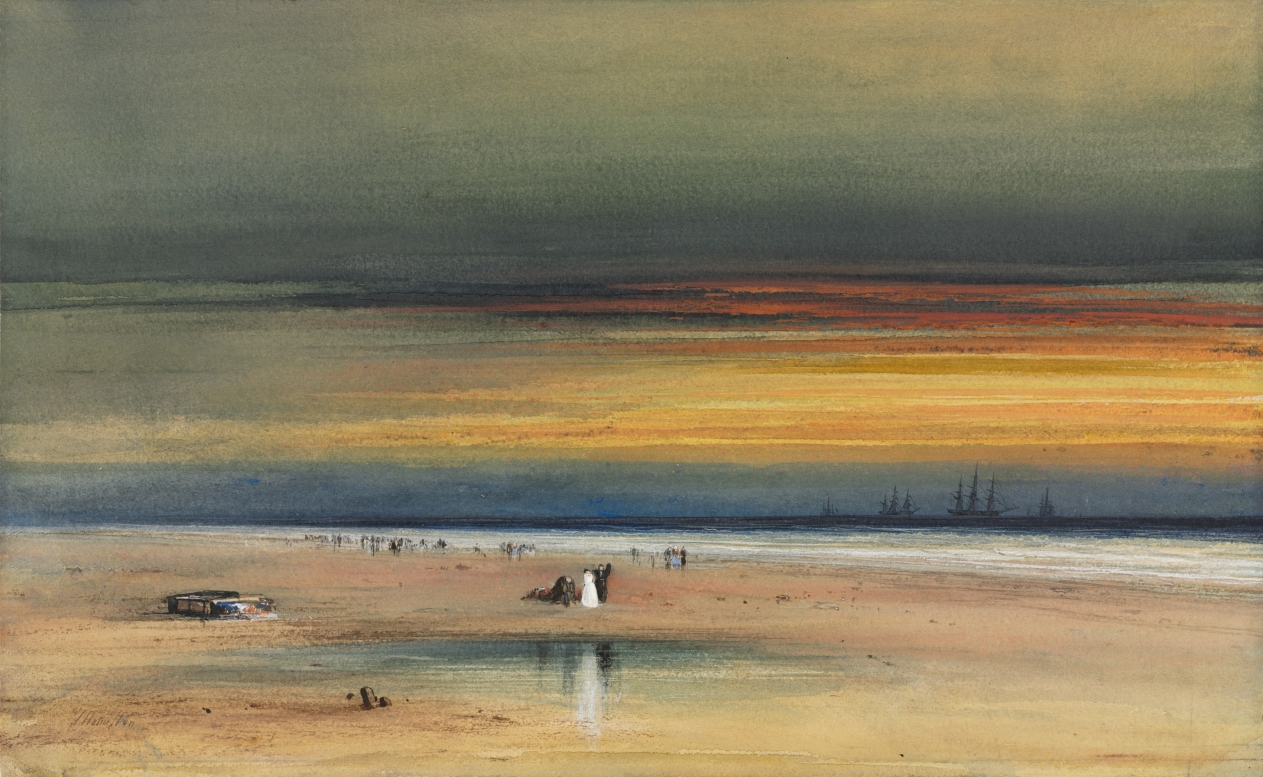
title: Beach Scene at Sunset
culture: America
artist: James Hamilton (American, 1819–1878)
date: c. 1865–1870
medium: watercolor and gouache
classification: Drawing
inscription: Inscribed in brown wash at lower left: "J Hamilton"